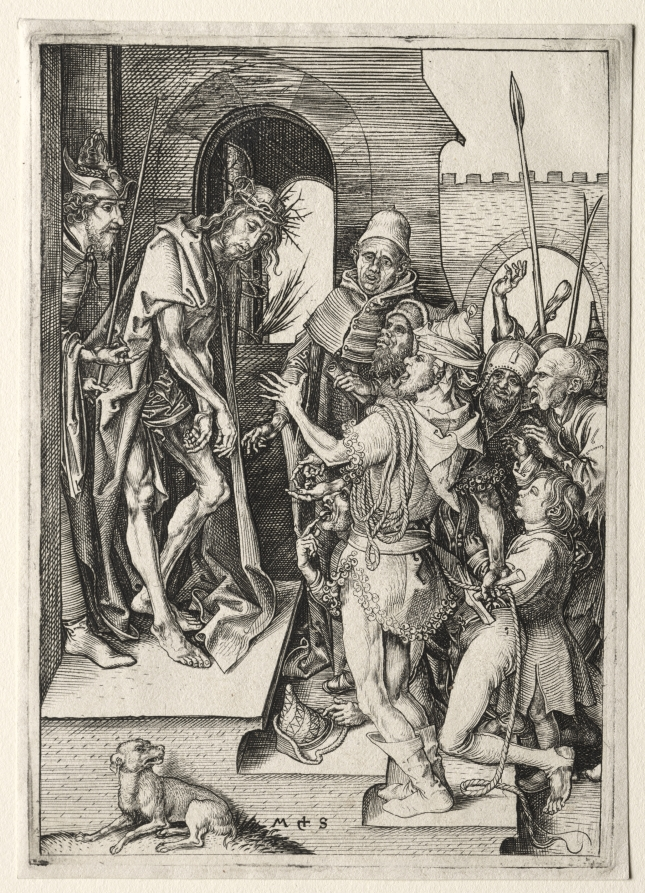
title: The Passion: Ecce Homo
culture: Germany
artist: Martin Schongauer (German, c. 1450–1491)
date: c. 1480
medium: engraving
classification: Print